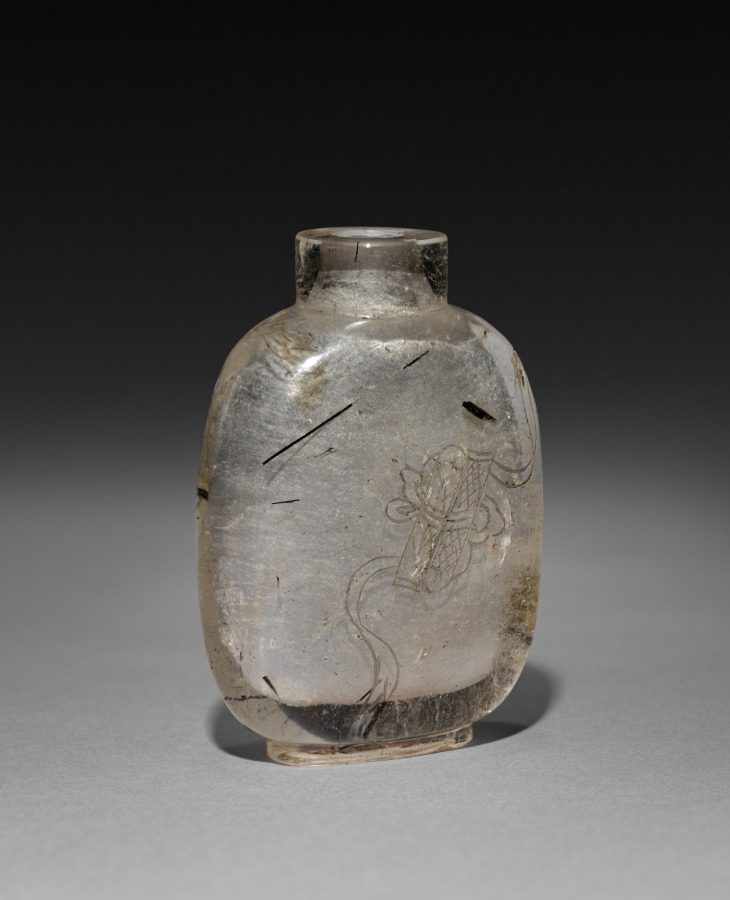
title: Snuff Bottle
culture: China, Qing dynasty (1644-1911)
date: 1644–1911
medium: glass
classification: Glass